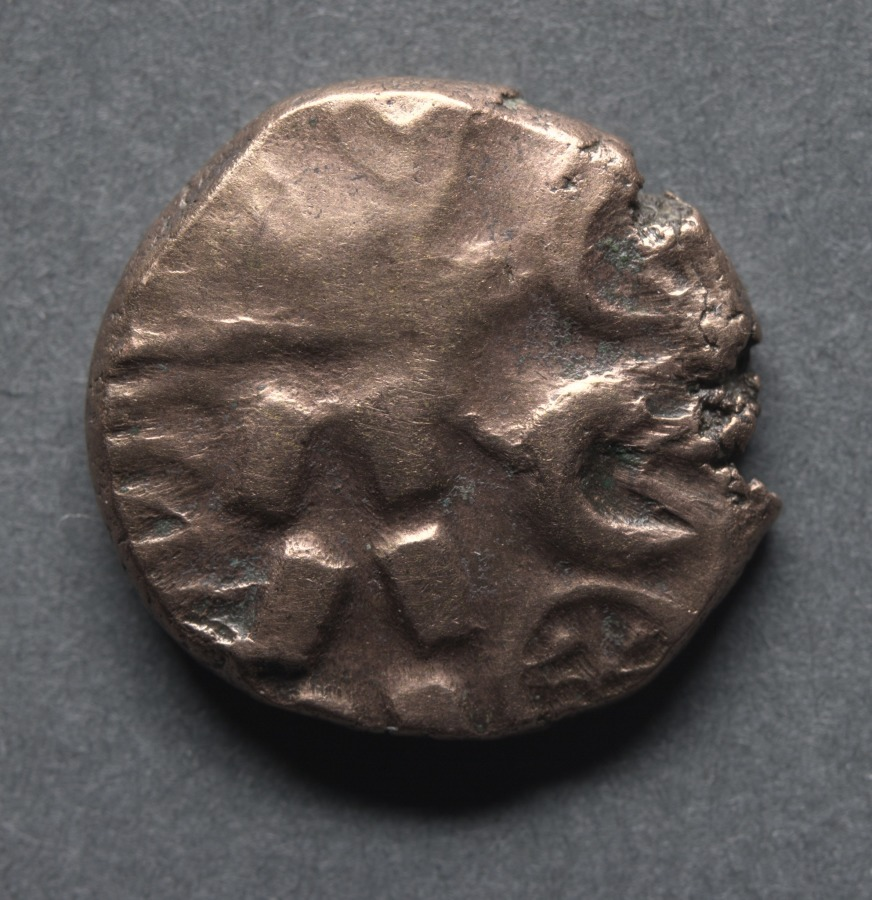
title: Stater: Wreath, Crescents, and Wheel (obverse); Horse and Diamond (reverse)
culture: England, Corieltauvi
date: 10 BCE–30 CE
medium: gold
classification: Coins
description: The Coritani were a Belgic tribe which occupied parts of middle-eastern England now known as the counties of Leicestershire, Rutland, Lincolnshire, Nottinghamshire, and probably parts of Derbyshire and the southern part of the West Riding of Yorkshire. At one time this type, together with others of the Ancient British series, were ascribed to the Brigantes, a tribe occupying parts of Yorkshire and territory north thereof.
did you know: The Corieltauvi were a largely agricultural people who had been producing coins since the beginning of the 1st century.